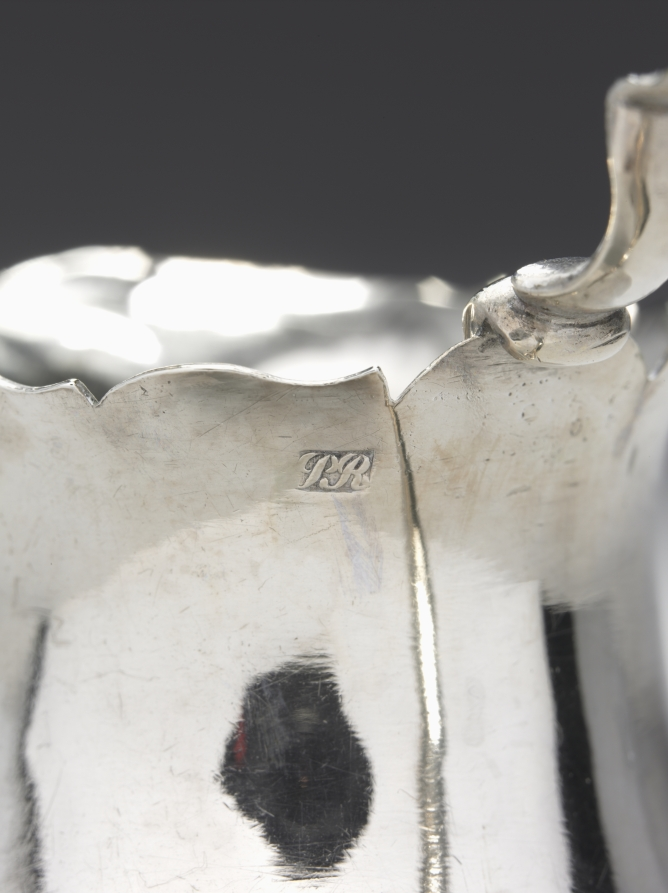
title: Cream Pitcher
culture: America, Massachusetts, Boston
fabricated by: Paul Revere II (American, 1735–1818)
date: c. 1765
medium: silver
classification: Silver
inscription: "P . . .H/to/P . . .E" in block letters under foot, and "MHP" in bright-cut script on front, opposite handle.